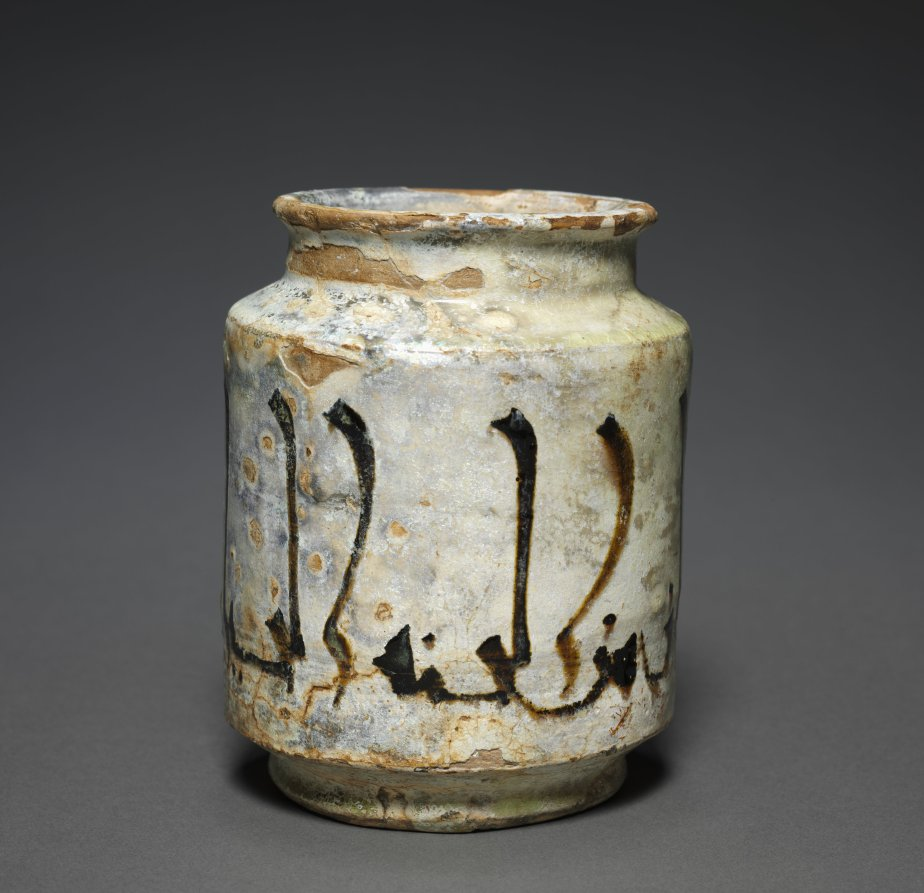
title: Albarello Jar with an Aphorism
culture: Central Asia, Samarkand, Samanid period (819–1005)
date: 900s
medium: Earthenware with underglaze decoration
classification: Ceramic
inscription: In Arabic: al-haya min al-iman w'al-iman min al-janna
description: The albarello was a jar designed to hold ointments and drugs for pharmacists. They were produced in the Middle East and Spain, as well as late medieval and Renaissance Italy. Albarellos are usually painted with floral, vegetal, or geometric designs. Arabic inscriptions are less common but here the elegant text reads: “Modesty [comes] from faith, and faith [comes] from Paradise,” attributed to the Prophet Muhammad.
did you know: The jar's Arabic inscription written in Eastern Kufic script.